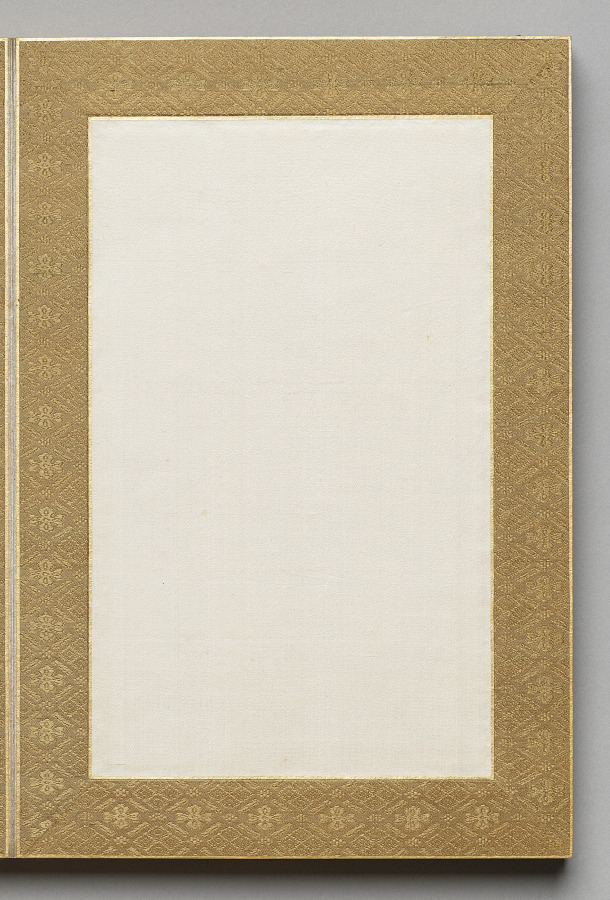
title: Painting from Flowers and Grasses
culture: Japan, Edo period (1615–1868)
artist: Tsubaki Chinzan (Japanese, 1801–1854)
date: 1841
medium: album; ink and color on silk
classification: Painting